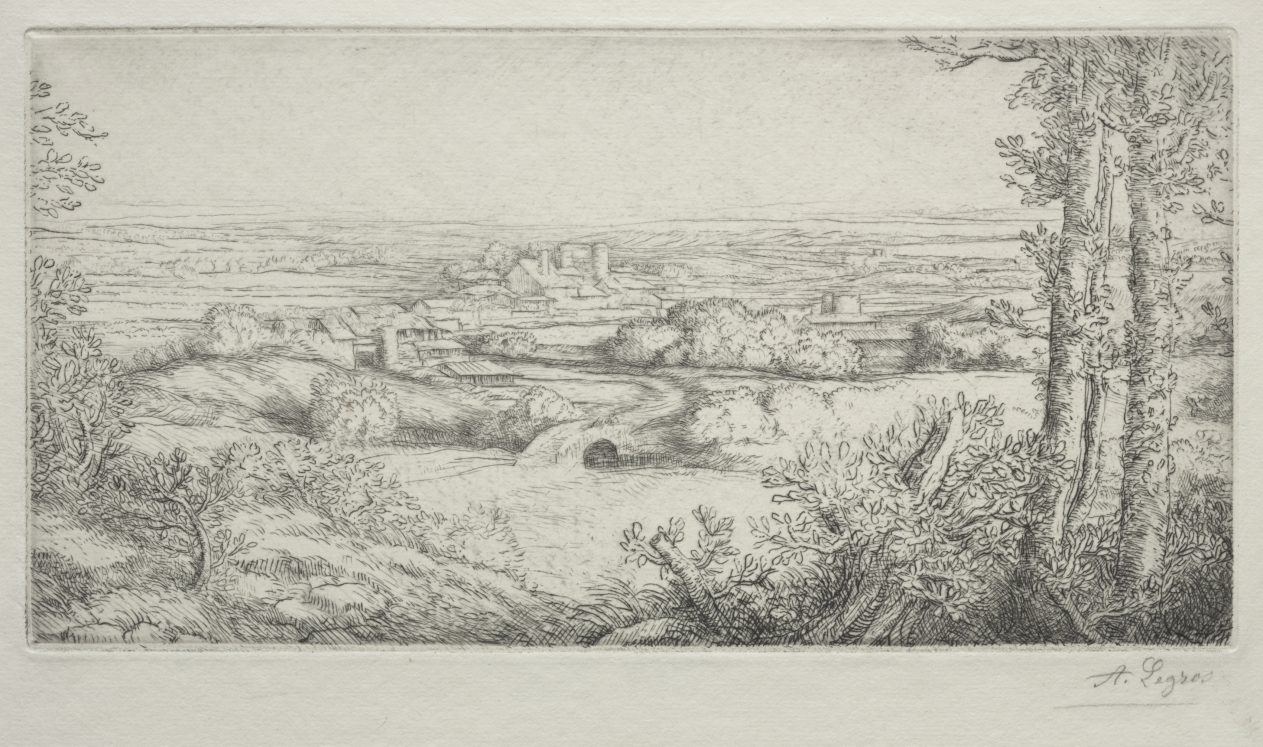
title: A Valley in Burgundy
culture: France, 19th century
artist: Alphonse Legros (French, 1837–1911)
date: c. 1857–1911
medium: drypoint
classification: Print